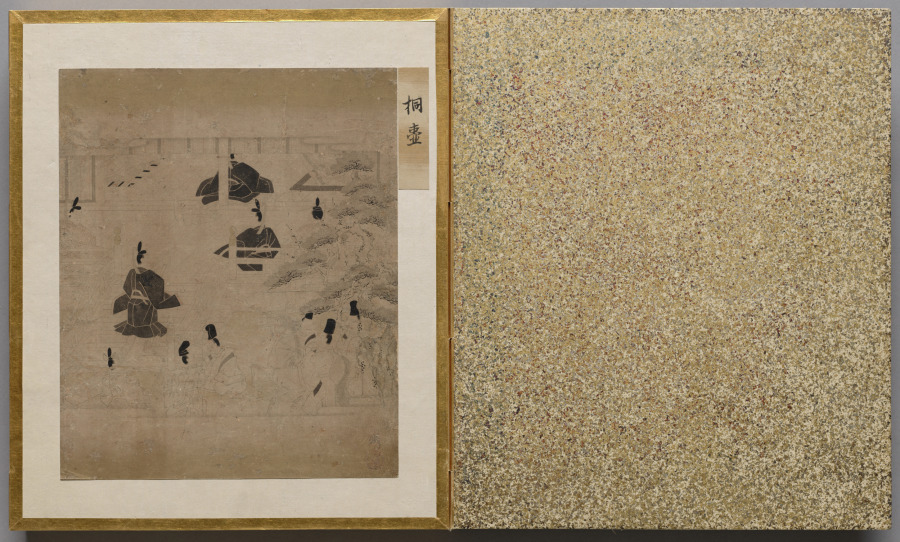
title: Paulownia Court from Album of Illustrations for the Tale of Genji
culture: Japan, Edo period (1615–1868)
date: 1600s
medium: painting in an accordion-style album; ink, light color, and gold on paper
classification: Bound Volume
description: This album contains illustrations for the classic literary work the Tale of Genji, authored in the 1000s by Murasaki Shikibu, an aristocrat of the Heian period (794–1185) court. The scenes are painted in the “white drawing” (hakubyō) mode, in which a fine ink line is used to depict figures and spaces with great subtlety, punctuated only occasionally by traces of red pigment for a character’s lips, a detail of a garment, or a decorative element. These two scenes illustrate episodes from the chapters “Thin Veil of Cloud” (Usugumo) and “Barrier Gate” (Sekiya).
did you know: The illustrations are identified by chapter title in cartouches to the upper right of the paintings.